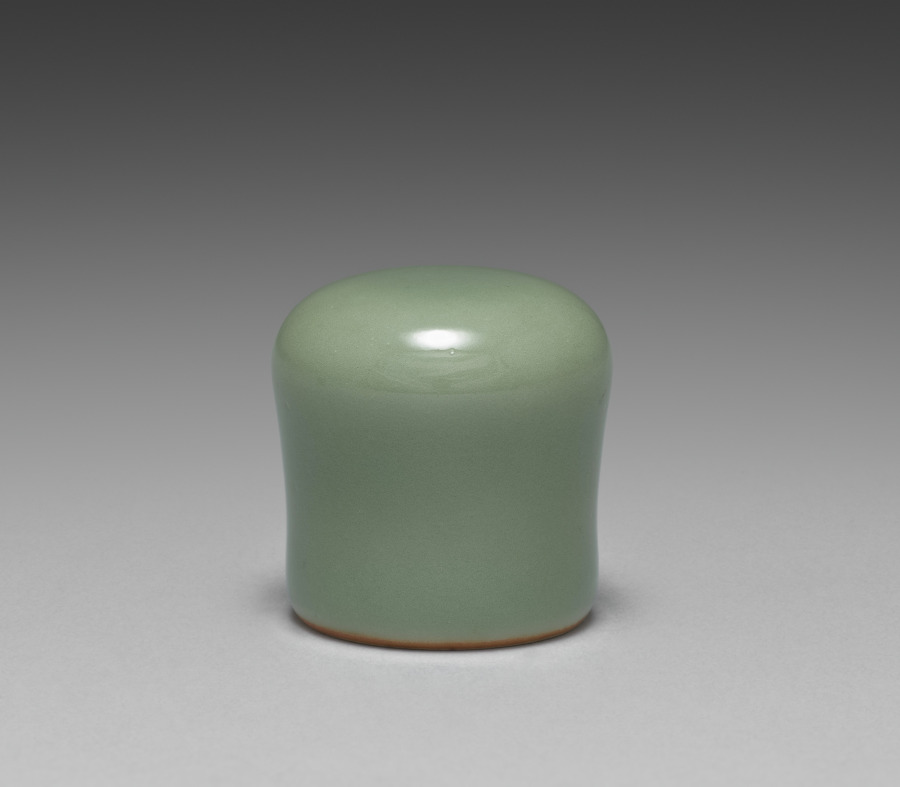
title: Roller End for Hanging Scroll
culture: Japan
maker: Seifū Yohei III (Japanese, 1851–1914)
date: 1893–1914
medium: One of a pair of hanging scroll roller ends; porcelain with celadon glaze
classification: Ceramic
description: Before entering into his apprenticeship with Yohei II, Seifū Yohei III trained as a painter in Osaka. He continued to paint throughout his career as a ceramist. As part of his ceramic practice, Yohei III also made roller ends to be placed at either end of the wooden dowel around which the lower part of a hanging scroll mounting is wrapped. These served both as weights for the painting and as knobs for handling it when rolling and unrolling. The pair here is made of porcelain with a green glaze.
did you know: This is one of two roller ends for the hanging scroll by Seifū Yohei III, Rain Clearing over a Summer’s Mountain, CMA 2022.151.